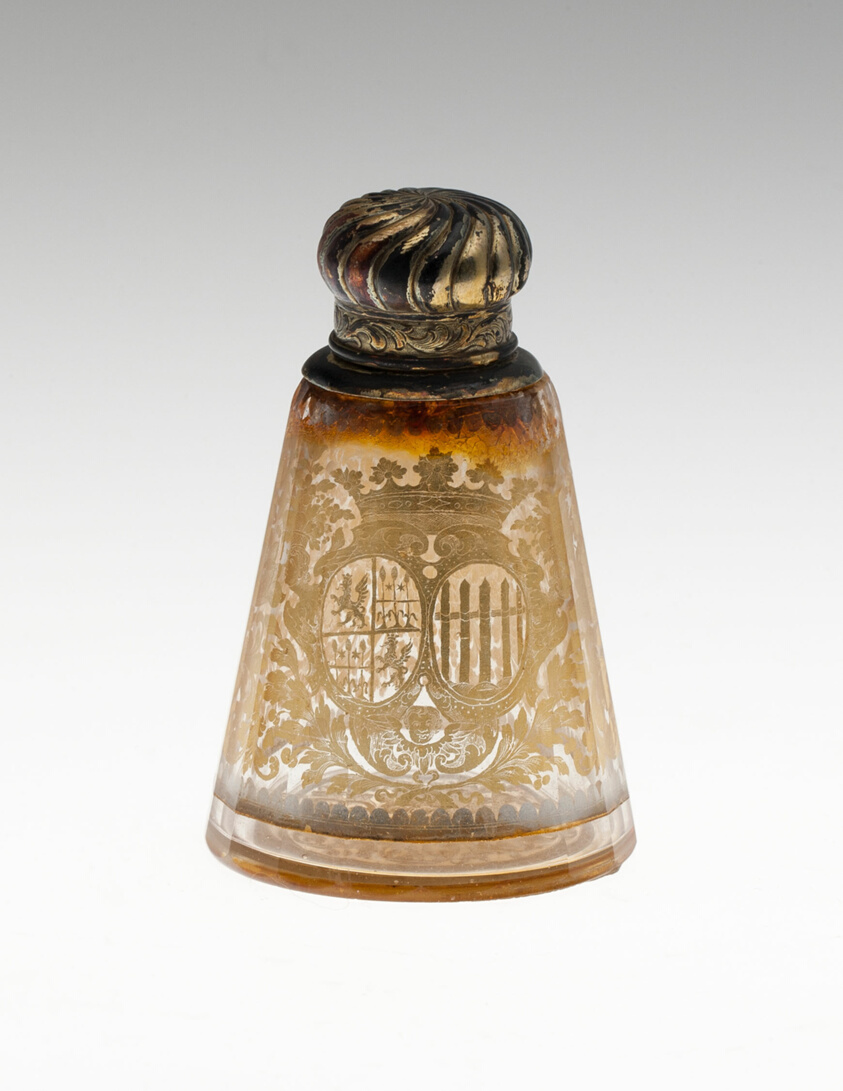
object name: Glass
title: Flask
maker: Bohemia, Czech Republic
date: c. 1730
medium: Glass with engraved gold leaf decoration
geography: Bohemia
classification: glass; european decorative arts